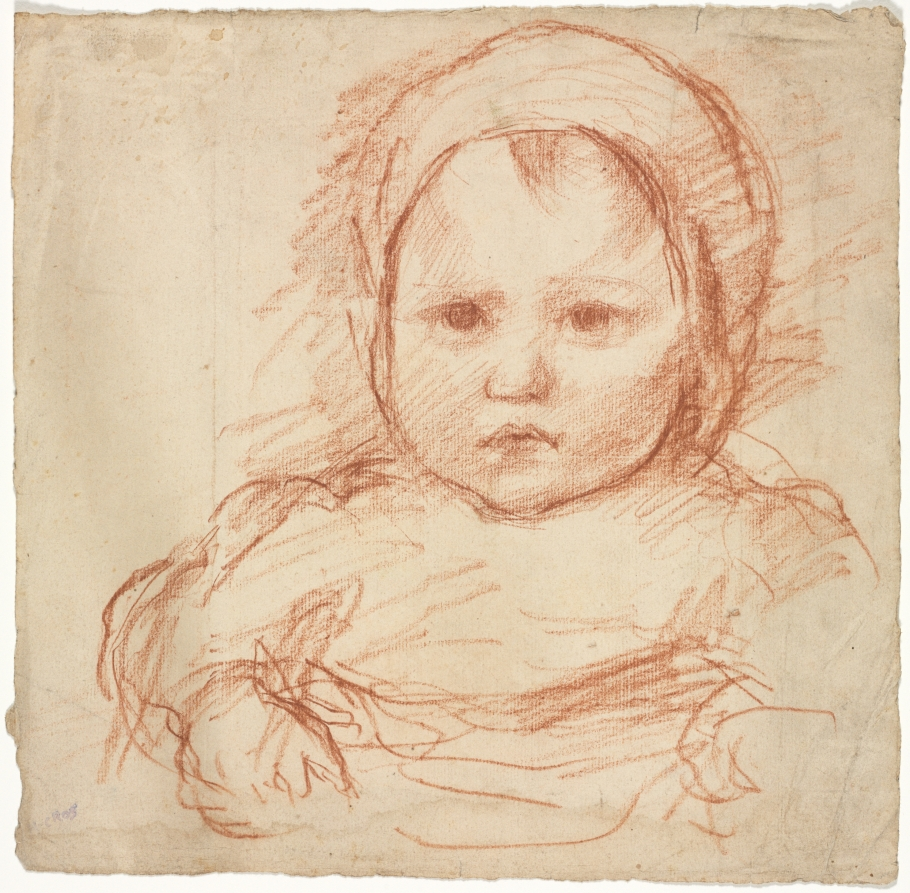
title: Portrait of an Infant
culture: France, 19th/20th century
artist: Henri Cros (French, 1840–1907)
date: 1800s-1900s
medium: sanguine on off-white laid paper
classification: Drawing